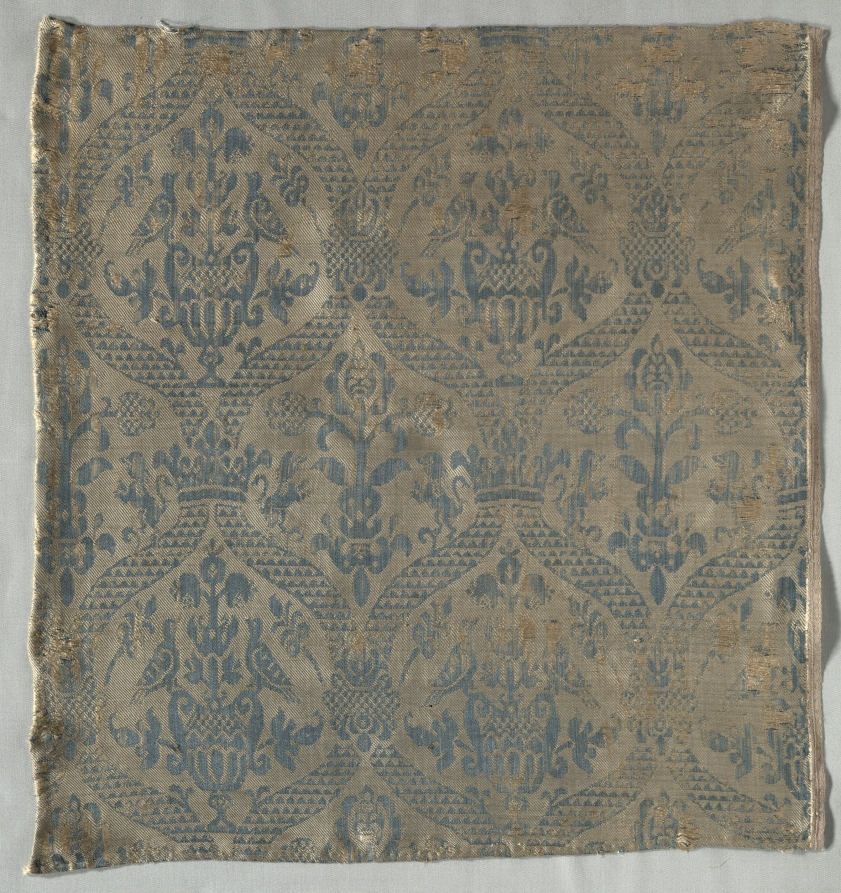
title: Damask Fragment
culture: Italy, 16th century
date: 1500s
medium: damask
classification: Textile